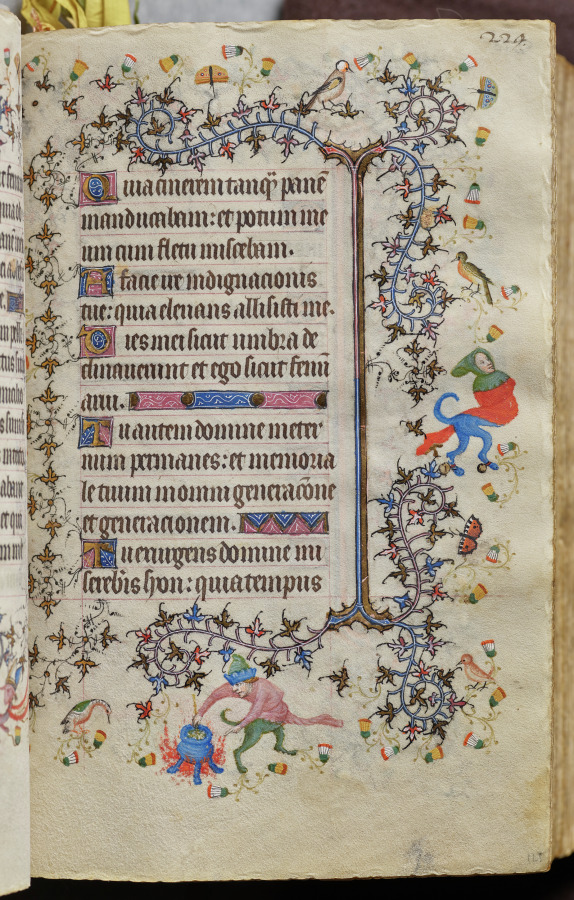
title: Hours of Charles the Noble, King of Navarre (1361-1425): fol. 115r, Text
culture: France, Paris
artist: Master of the Brussels Initials and Associates (French)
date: c. 1405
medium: ink, tempera, and gold on vellum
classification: Bound Volume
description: This precious volume was obviously highly prized by its owner, the French-born King of Navarre, who had his coat of arms painted on no less than twenty folios. Rather than directly commissioning this manuscript from a specific workshop, it seems that Charles the Noble acquired his book of hours -- perhaps ready-made for the luxury market -- while on a trip to Paris in 1404-05. A collaborative effort, six painting styles are evidenced within the pages of this codex, those of two Italians, two Frenchmen, and two Netherlanders. The painter who was responsible for the planning and decoration of the book, and who produced seventeen of the large miniatures, was a Bolognese artist known as the Master of the Brussels Initials. His principal assistant, responsible for most of the borders, was a Florentine who signed his name "Zecho" da Firenze on folio 208 verso.